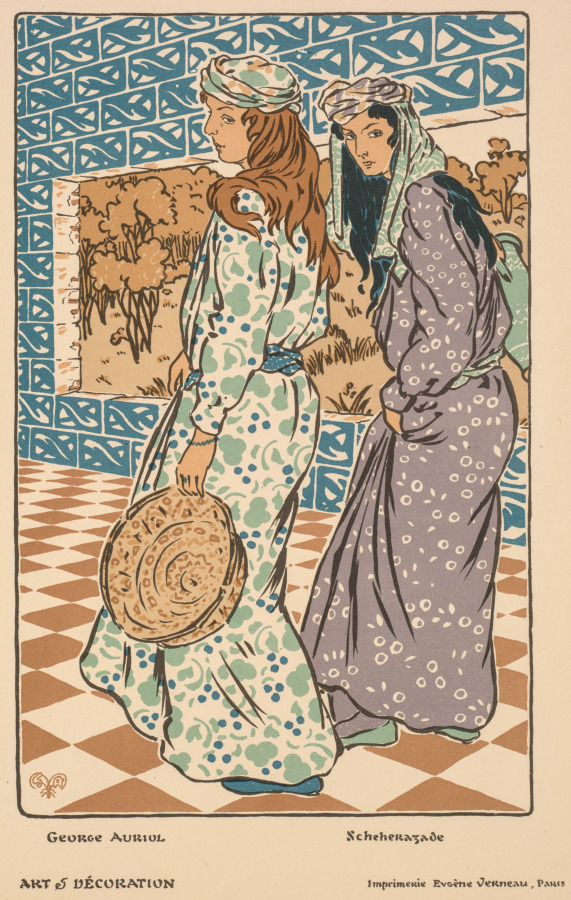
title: Scheherazade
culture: France, 20th century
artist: George Auriol (French, 1863–1938)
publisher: Art et Décoration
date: 1901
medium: color lithograph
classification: Print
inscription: Inscribed on mat, in graphite: George Auriol: Schéhérazade. Lithograph printed in colors, 1901. Leroy-Crevecoeur 14. Edition as published / by Art et Décoration, 1901. With the monogram in the stone.